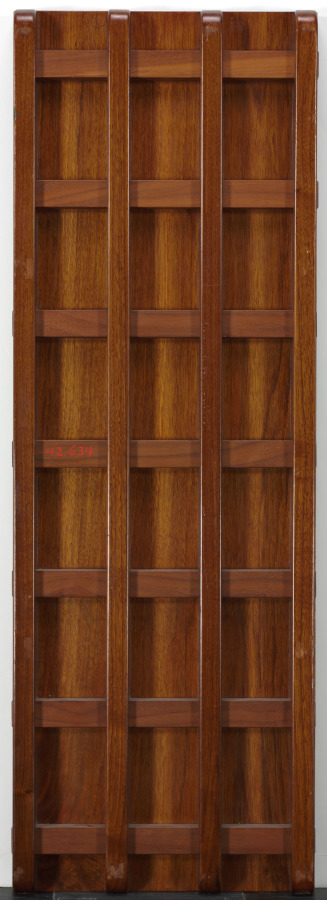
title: Saint Barbara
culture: Flanders, Bruges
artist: Master of the Holy Blood (Netherlandish)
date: c. 1520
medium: tempera on wood panel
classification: Painting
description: Saint Barbara holds both a book and a ring symbolizing her scholarly pursuits and union with God. According to legend, the leather thongs with which she was beaten were transformed into peacock plumes. This painting and one other in the collection (1942.633.1) were originally the wings of an altarpiece flanking a central panel, now lost, that may have depicted the Holy Family. The identity of this artist is unknown, but he is named for a painting in the Chapel of the Holy Blood in Bruges. Bruges flourished as an international commercial center through the 1400s and early 1500s. Among its residents were many foreign merchants and bankers who, along with the Burgundian court, patronized artists and attracted specialized craftsmen such as furriers, hatters, jewelers, and goldsmiths. Bruges’s artistic production in the 1400s included celebrated artists like Jan van Eyck, Petrus Christus, Hans Memling, and Gerard David who painted large altarpieces, small panels for private devotion, and portraits. Bruges also remained an important center for the production of illuminated manuscripts.